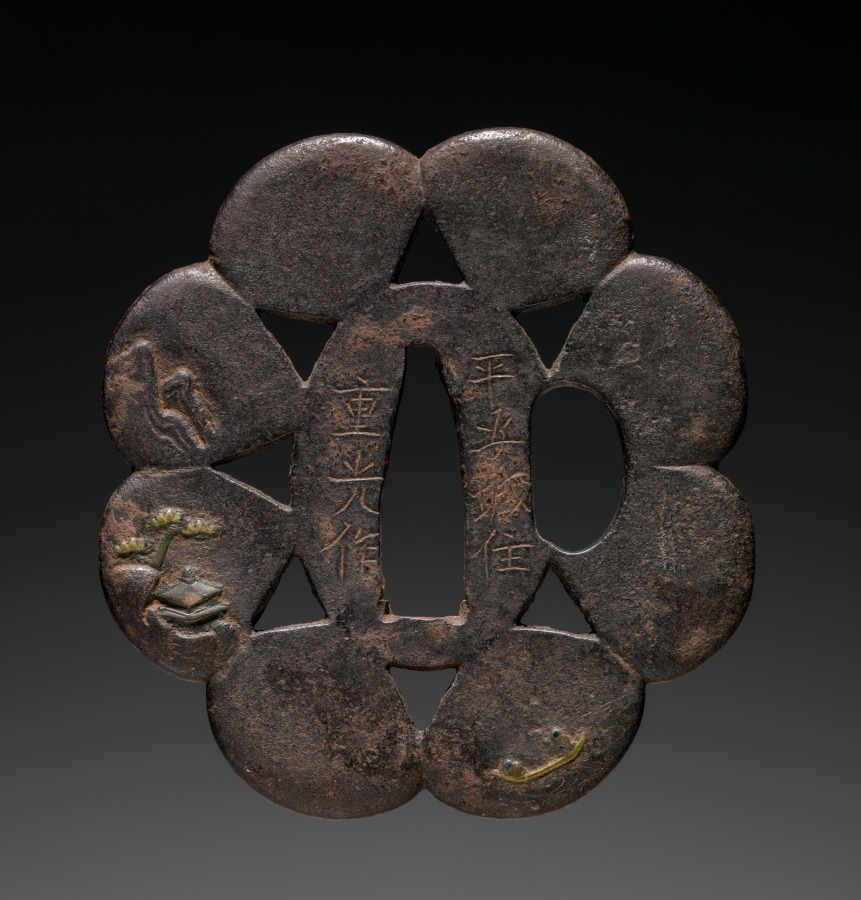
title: Sword Guard (Tsuba) with Chinese Landscape in Flower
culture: Japan, Edo period (1615–1868)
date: 1615–1868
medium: iron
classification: Arms and Armor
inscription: signed: 平安城住重光作